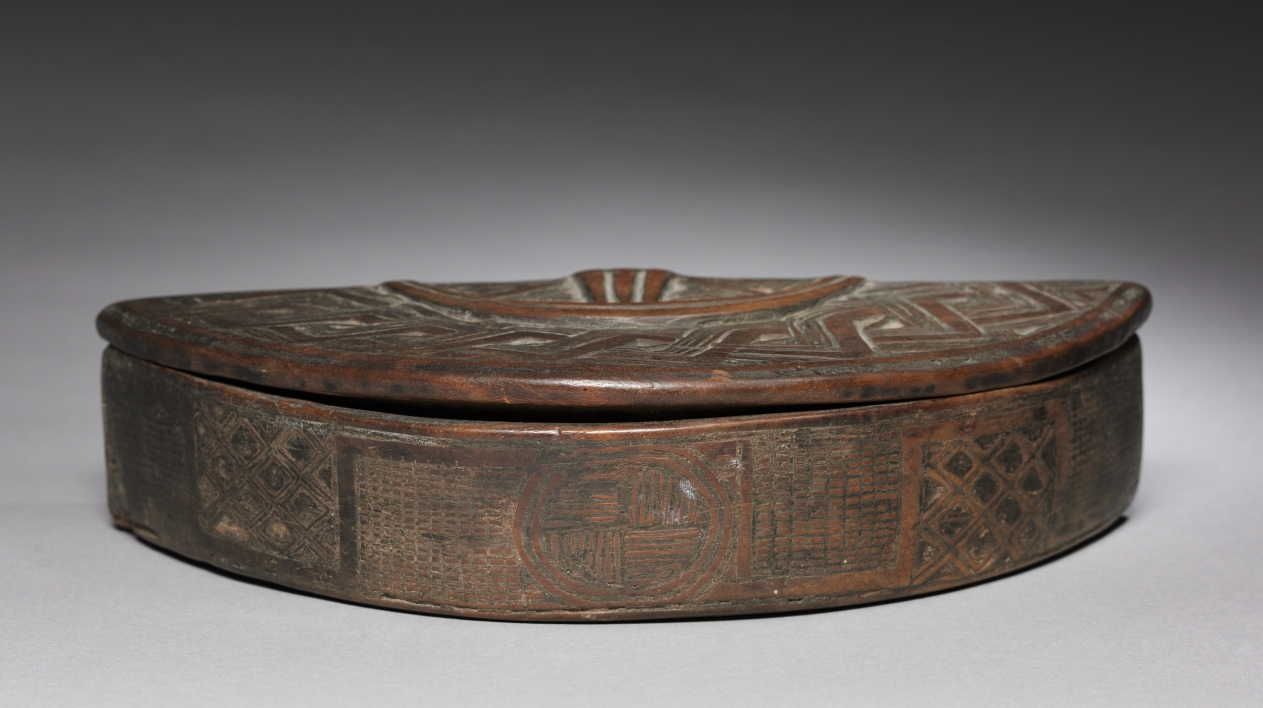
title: Box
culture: Africa, Central Africa, Democratic Republic of the Congo, Kuba-style maker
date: early 1900s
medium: Wood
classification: Vessels